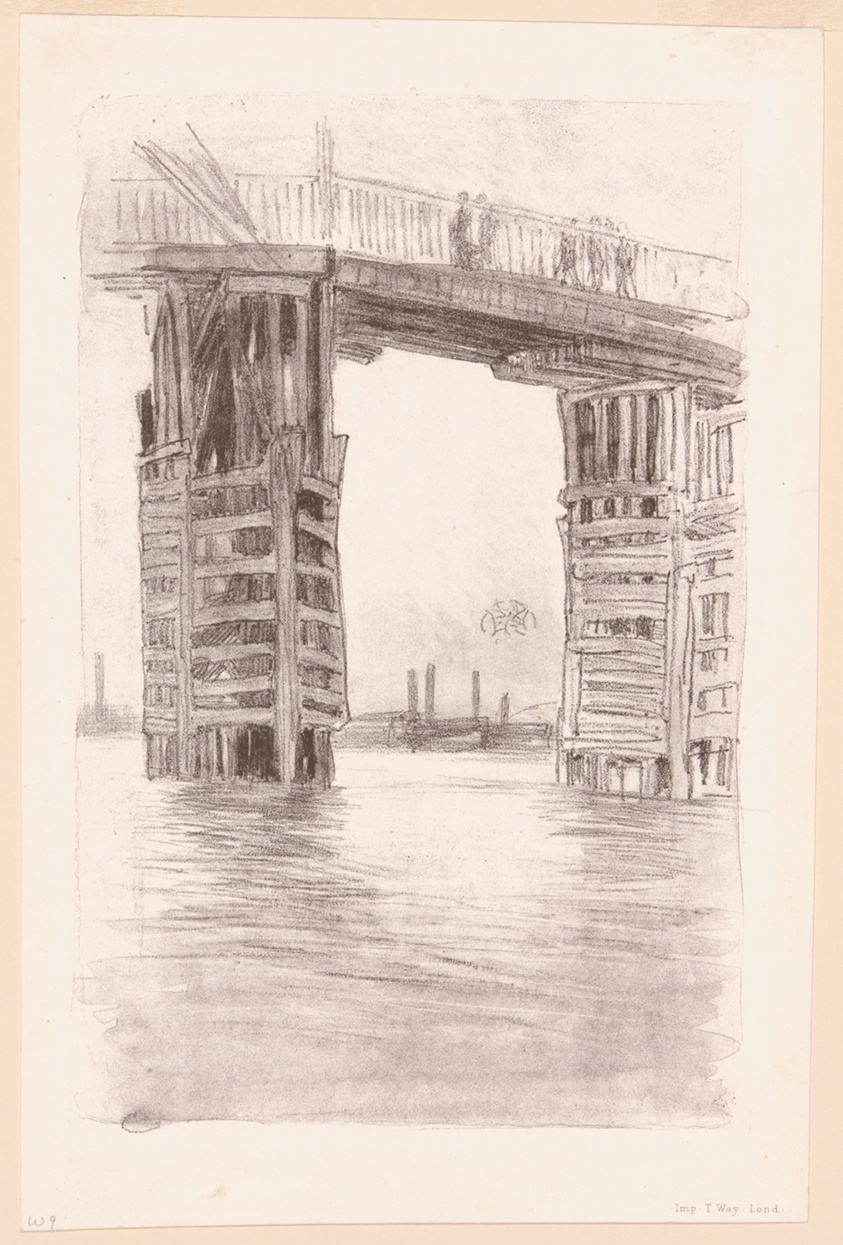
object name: Print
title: The Tall Bridge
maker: James McNeill Whistler (American, 1834-1903)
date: 1878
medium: Lithotint, in black ink, with scraping, on ivory plate paper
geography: United States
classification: lithotint; lithograph; print; prints and drawing; paper